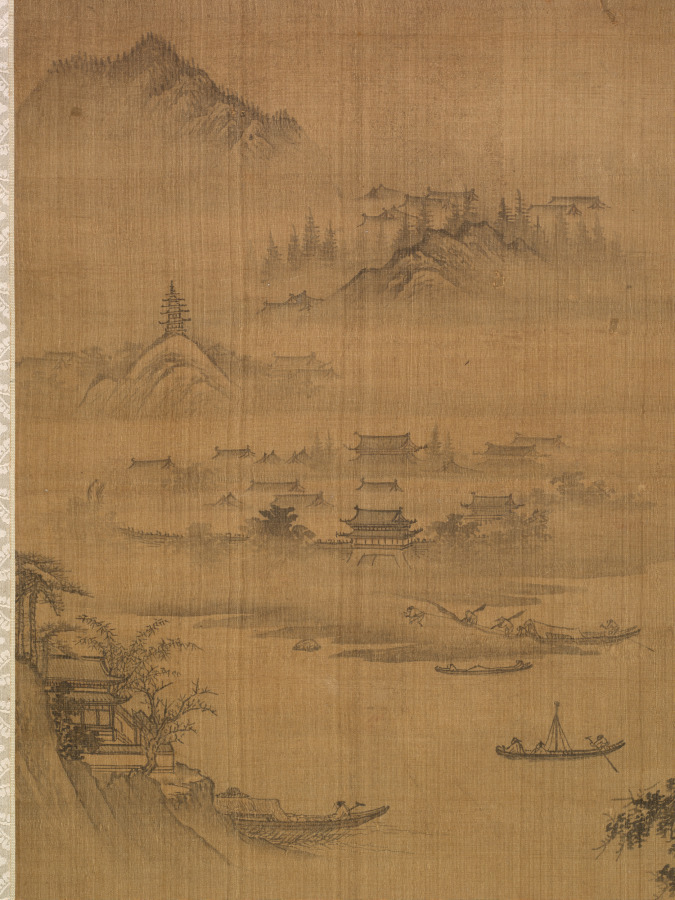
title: Mountain Market, Clear with Rising Mist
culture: Korea, Joseon dynasty (1392–1910)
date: early 1500s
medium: Hanging scroll; ink on silk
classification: Painting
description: This painting depicts several vignettes of the scholar-hermit’s various activities. In the lower left corner, the scholar-hermit is portrayed welcoming his guest in the courtyard. In the middle section on the lower bottom, the scholar and his guest are shown encountering another traveler on the bridge and exchanging their greetings. After crossing the bridge, the scholar visits a friend who lives in a compound of multiple buildings. The two friends decide to take a short walk. Both appear in a terraced cliff, enjoying a mountain vista and the fragrance of an old pine tree carried by the gentle wind. The scholar continues his journey with his two servants. They are portrayed crossing a winding wooden bridge. Right beyond the colossal rocky mountain, a panoramic view to a bustling market place unfolds, suggesting that it may be the place where the scholar-hermit’s entourage would visit. Perhaps the scholar need to buy items such as books, rolls of papers, and brushes, all essential to scholarly life. Toward the upper left corner, another group of travelers is landing on the river bank that leads to the city gate; they may be headed to the multistoried Buddhist stupa nestled on the top of the mountains.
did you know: Due to its stylistic features, this painting has long been believed to be a Chinese painting of the Northern Song period, dated to the 12th century.